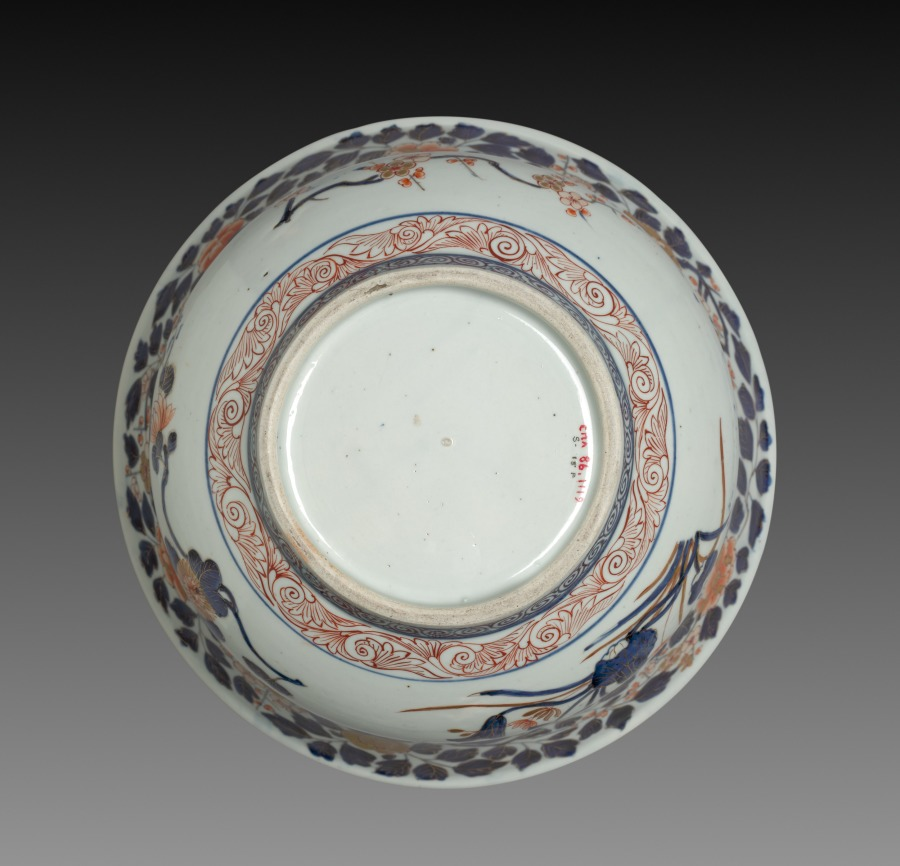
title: Vase (Imari ware)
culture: Japan, Edo period (1615–1868)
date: c. 1700s–1800s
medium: underglaze blue with overglaze red porcelain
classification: Ceramic